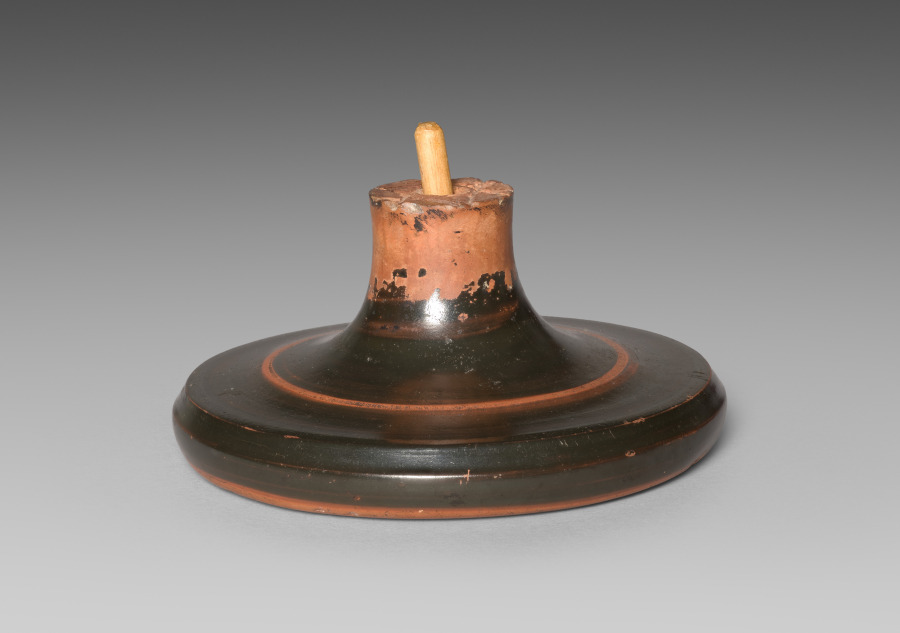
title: Foot from Red-Figure Kylix (Drinking Cup)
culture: Greece, Athens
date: c. 480 BCE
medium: ceramic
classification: Ceramic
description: Removed during an extensive conservation treatment in 1990, this foot was broken from a different kylix and used in an ancient repair. It likely once belonged to a differently proportioned cup than the one to which it was long attached, as seen by its thicker stem and smaller foot diameter.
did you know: Originally from a different kylix, this foot was used in an ancient repair.